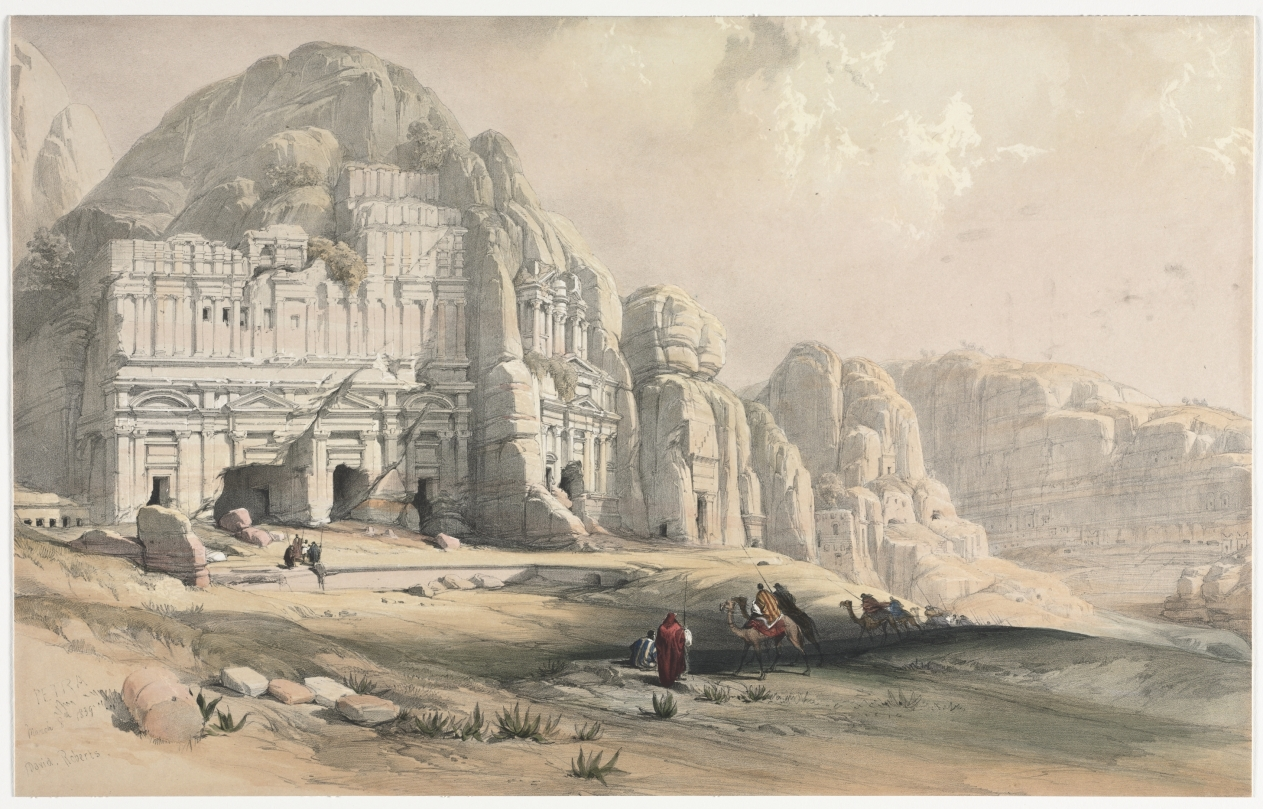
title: Petra, Eastern End of the Valley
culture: England, 19th century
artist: David Roberts (Scottish, 1796–1864)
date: 1839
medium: color lithograph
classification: Print